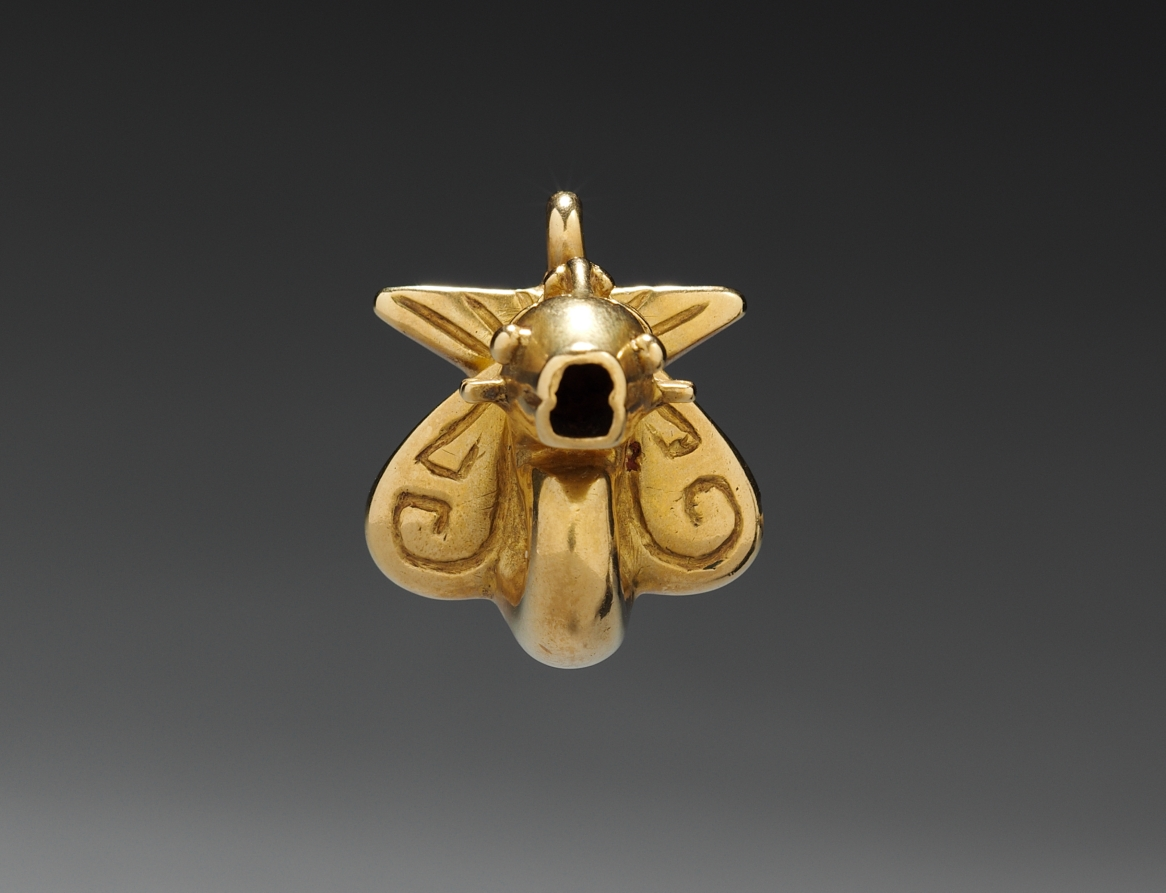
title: Pendant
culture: Panama, International Style, 5th-7th century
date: 400–700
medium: cast gold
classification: Metalwork